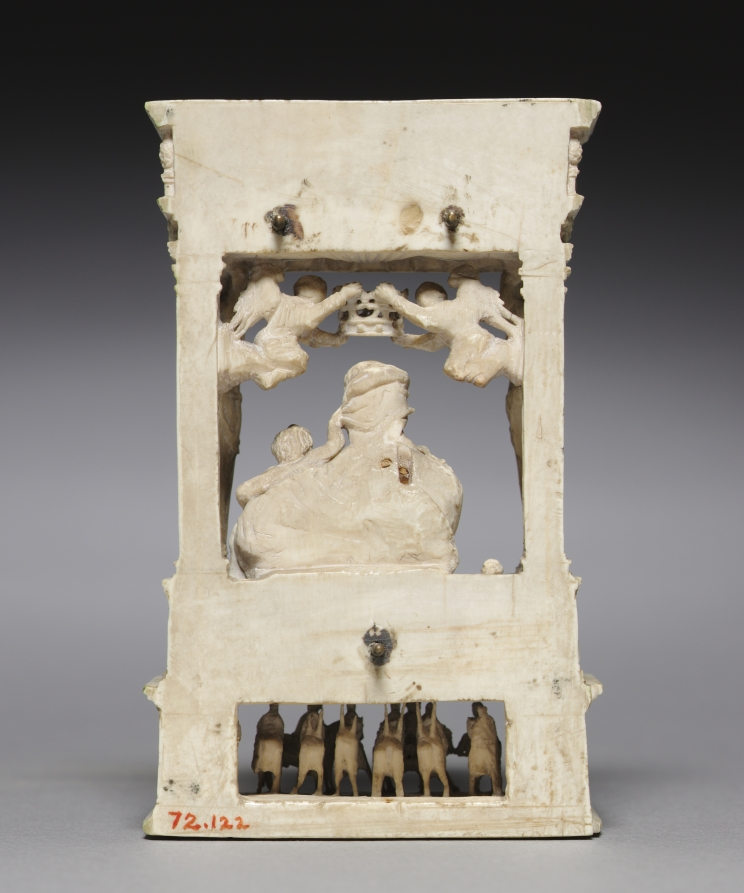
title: Virgin and Child in an Architectural Frame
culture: Flanders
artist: style of Jan Gossaert (Flemish, c. 1475/78–1532)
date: c. 1530–40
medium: ivory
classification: Sculpture